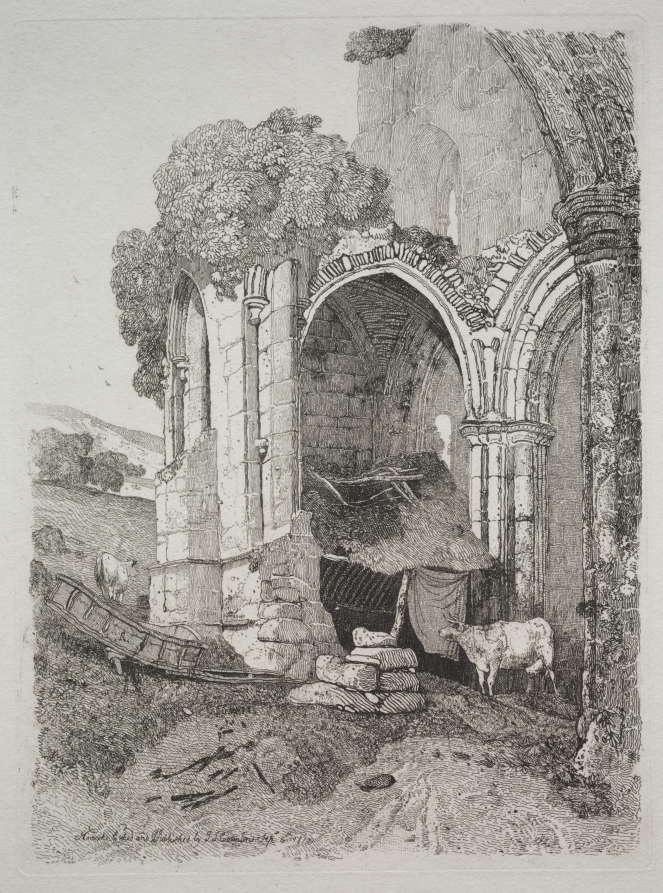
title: Rievaulx Abbey, Yorkshire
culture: England, 19th century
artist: John Sell Cotman (British, 1782–1842)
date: 1810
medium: etching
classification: Print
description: Rievaulx Abbey belongs to Cotman’s first series of etchings, published in 1811. The thirteen images depict the landscape of Yorkshire and picturesque architectural views such as rural cottages, ancient stone walls, and overgrown, ruined abbeys. The crumbling Gothic church was a quintessentially Romantic theme, intended to allude to a lost past.